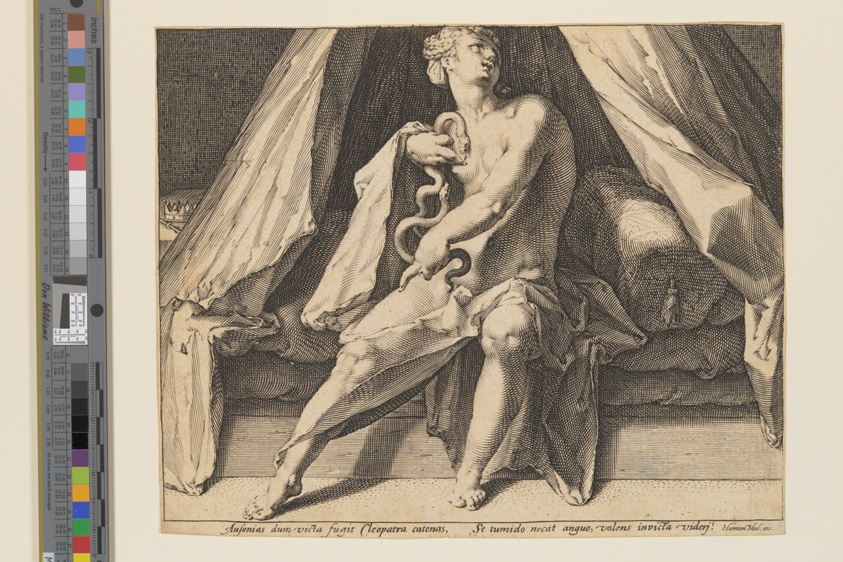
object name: Print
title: Cleopatra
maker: Jan Harmensz Muller; Dutch, 1571–1628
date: c. 1590-95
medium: Engraving on ivory laid paper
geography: Netherlands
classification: print; paper; prints and drawing; engraving